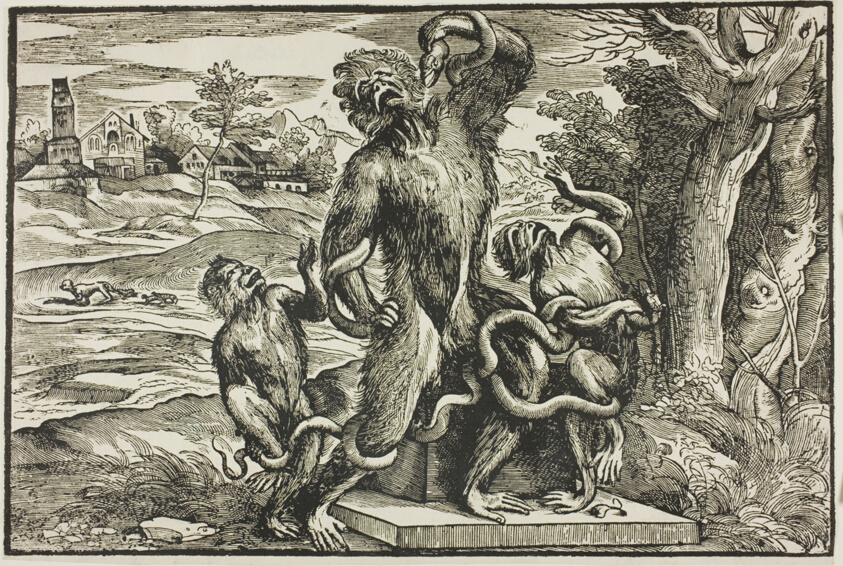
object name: Print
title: Laocoön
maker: Nicolò Boldrini (Italian, c. 1500–1566); after Titian (Italian, c. 1488-1576)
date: 1540/45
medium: Woodcut printed in black on ivory laid paper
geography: Italy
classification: woodcut; print; prints and drawing